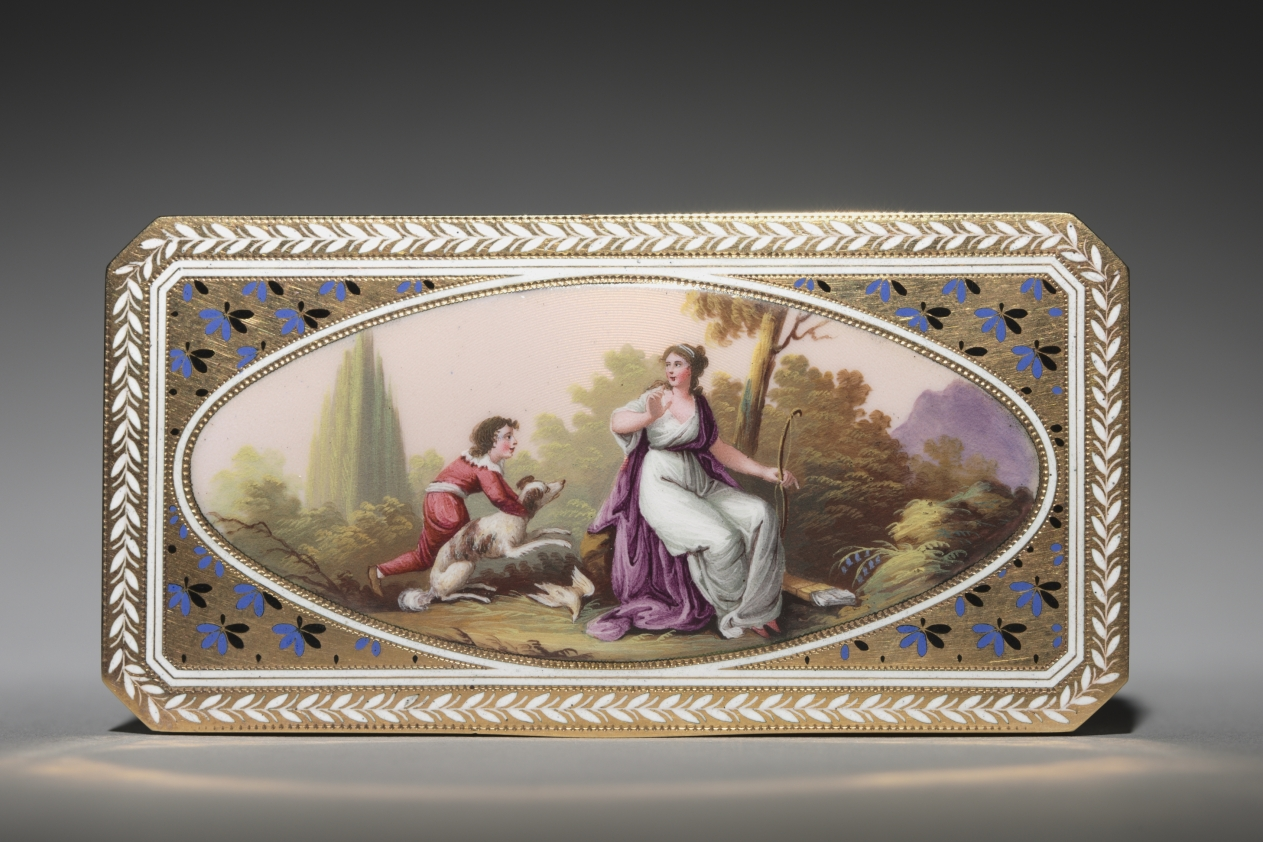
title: Box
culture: Switzerland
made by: probably by F. Joanin (Swiss)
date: c. 1810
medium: gold and enamel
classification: Miscellaneous